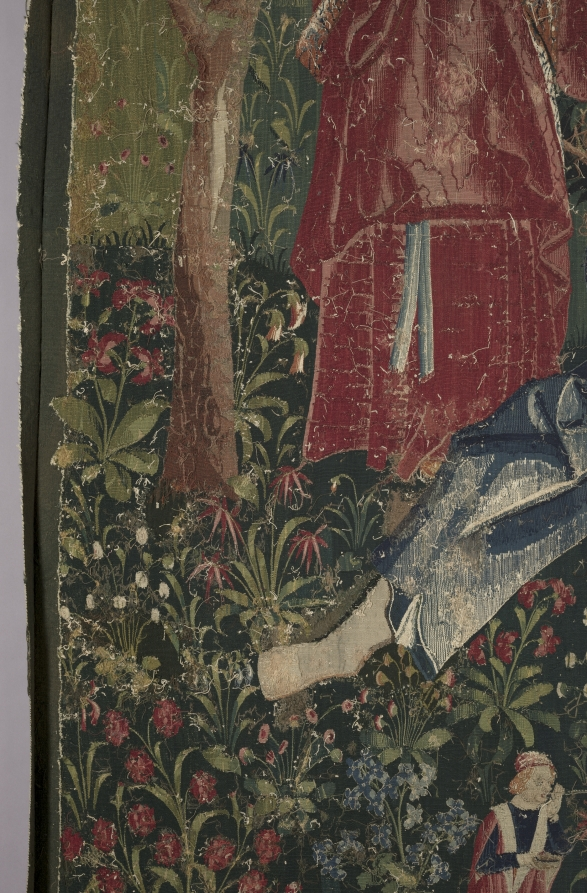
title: Youth (from Chateau de Chaumont set)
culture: France, Lyon(?), early 16th century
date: 1512–15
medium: silk and wool; tapestry weave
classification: Tapestry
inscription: French verse in Gothic letters translates as follows: Youth triumphs while its heart is healthy, And when it seems to hold all in its hand. But this triumph is without eternity. Here one sees the example full well: Those who are happy hide death in thier heart. Let the young heed this warning.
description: Louise of Savoy (1476-1531), queen mother of King Francis I, is depicted here in a sumptuous brocaded velvet in the center. She addresses youthful figures including Éléonore, Pierre Sala’s daughter who is facing her future husband, Hector. On the right, King Louis XII (died 1514) stands in front of the Chateau Langais where he had married Anne of Brittany. Above is Hector’s deceased father with a partially concealed skull under his robe, while a woman expresses surprise at the sight. The verse in Old French at the top states that youthful happiness is not eternal: Youth makes sounds as long as its heart is healthy, And thinks that it holds all in its hand. But this triumph is not eternal. Here you see clearly an example: He that is happy has death in his breast. Of this you people should take note.